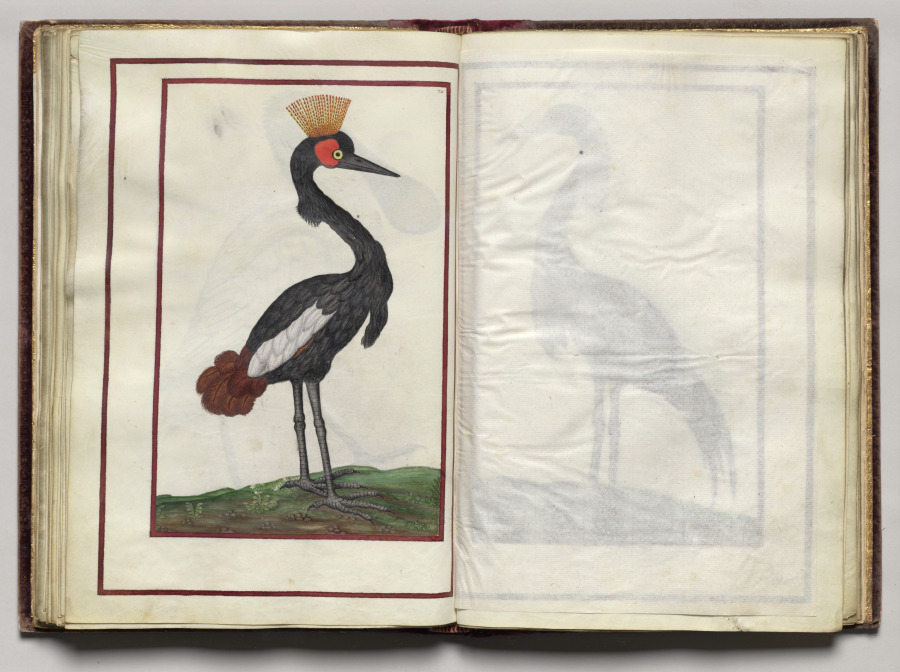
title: Black Bird with Crown, folio 35 (verso), from Florilegium (A Book of Flower Studies)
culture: France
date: 1608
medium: watercolor, ink, silver, and gold over occasional traces of pencil, on vellum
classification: Bound Volume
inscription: Dated: Poitiers 1608 (on frontispiece) Signed: On frontispiece in black ink, lower right: Van Kuyk Notation on drawing: Frontispiece: in pencil, lower margin: * élève de Van Kessel, peintre flammand (* in pencil also appears in front of Van Kuyk's name).